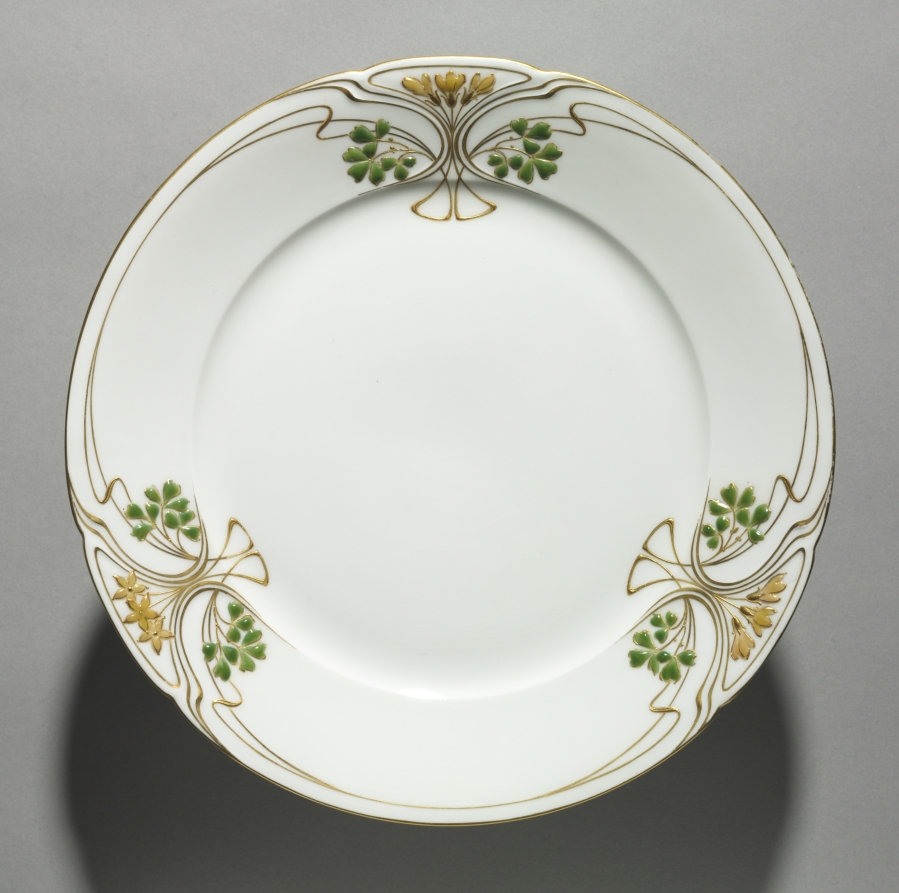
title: Plate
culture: Germany, 20th century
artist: KPM (Königliche Porzellan-Manufaktur) (German, Berlin, est. 1763)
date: 1901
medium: porcelain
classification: Ceramic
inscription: KMP" and a globe with a cross over it in red fired on overglaze enamel inside the support ring on the base.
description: Manufactured by the Royal Porcelain Factory in Berlin, this plate is decorated with elegant gilding around the perimeter and yellow flowers with green leaves.